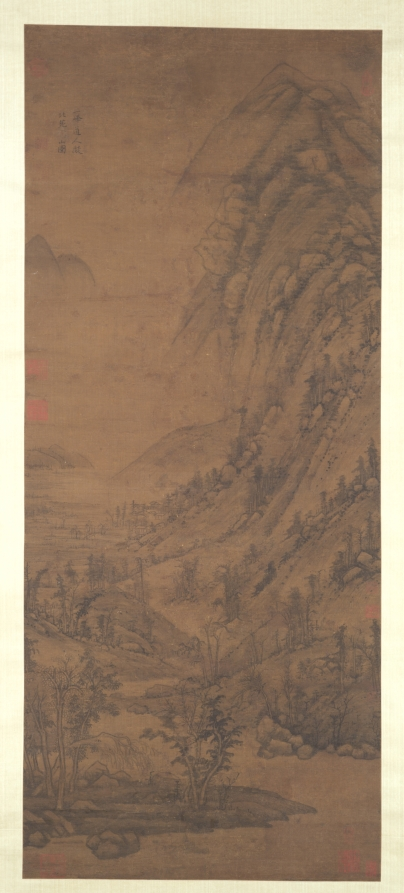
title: Summer Mountains (after Dong Yuan [active c. 937–75])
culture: China, Yuan dynasty (1271-1368)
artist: attributed to Huang Gongwang (Chinese, 1269–1354)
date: 1290–1354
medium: hanging scroll; ink and slight color on silk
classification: Painting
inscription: 【印】一峰道人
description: This monumental landscape is drawn in softly rounded strokes with darker lines frequently applied on top of lighter ones. This technique recalls one of the suggestions included in a collection of the artist's writings known as Secrets of Landscape Painting: The most difficult thing in painting is using the ink. The artist begins by using dilute ink and builds it up to the point where it begins to look right, then uses dense, black ink, applied fairly dry, and washes of deeper-toned ink. This technique distinguishes the fields from the paths, the far from the near. Huang Gongwang may have learned this technique from observing nature through the eyes of an earlier master, Dong Yuan, a painter whose style he shared.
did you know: The wet hills and moist, rich atmosphere evoke the southern Chinese summer, characterized by monsoon rains and lush growth.